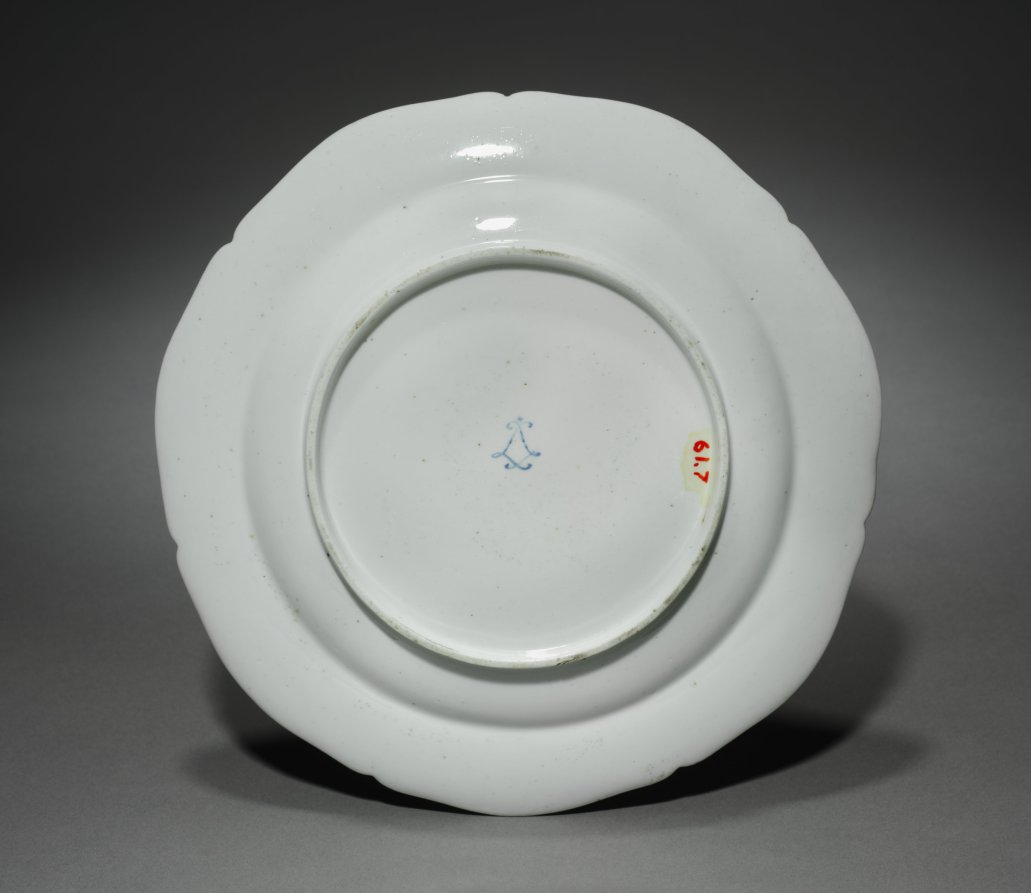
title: Plate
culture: France, Vincennes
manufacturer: Vincennes Porcelain Factory (France, 1740–56)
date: c. 1748–51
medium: porcelain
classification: Ceramic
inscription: Interlaced L's with dot above